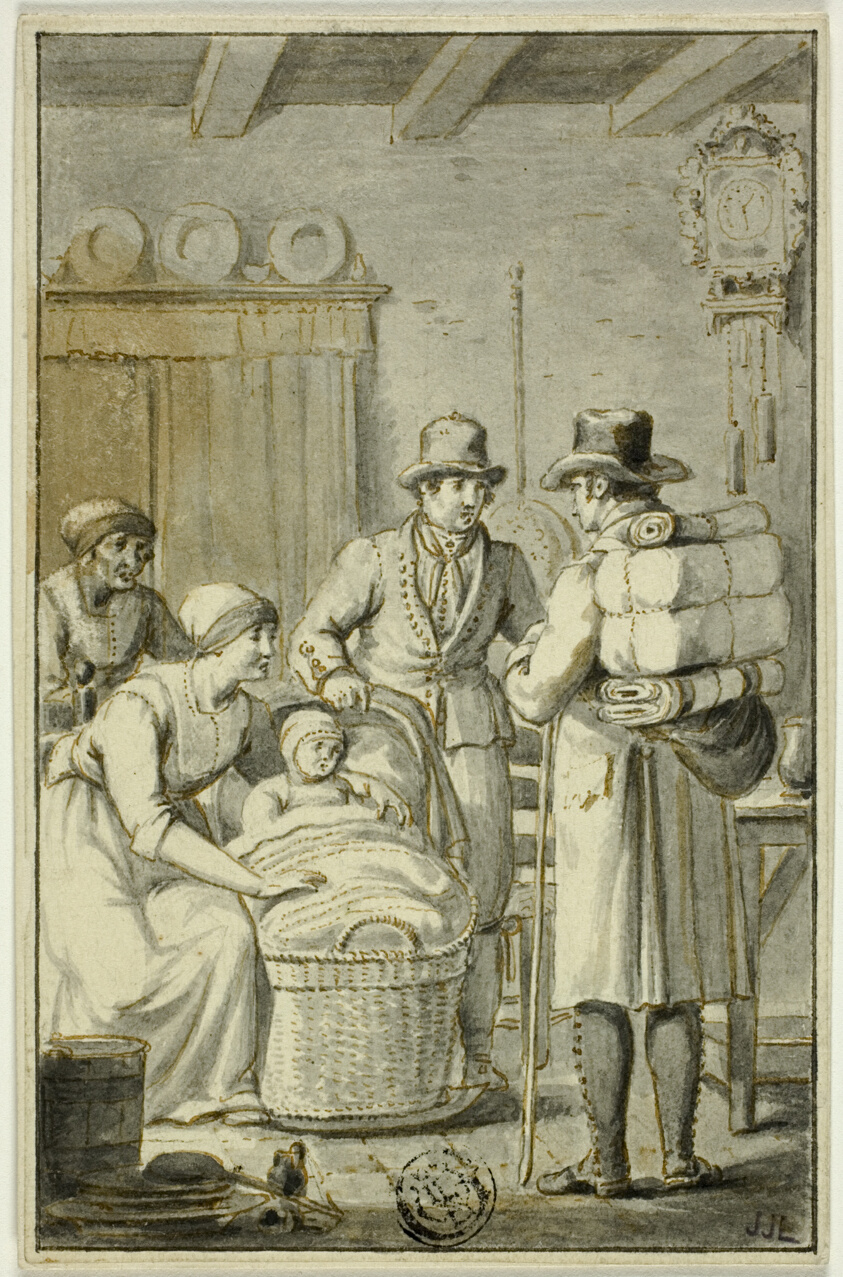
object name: Drawing and Watercolor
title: Traveler Talking with Family in Kitchen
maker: Possibly Jacob Smies; Dutch, 1764-1833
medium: Pen and brown ink, with brush and gray wash, on ivory wove paper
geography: Holland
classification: ink or chalk wash; drawings (visual works); prints and drawing